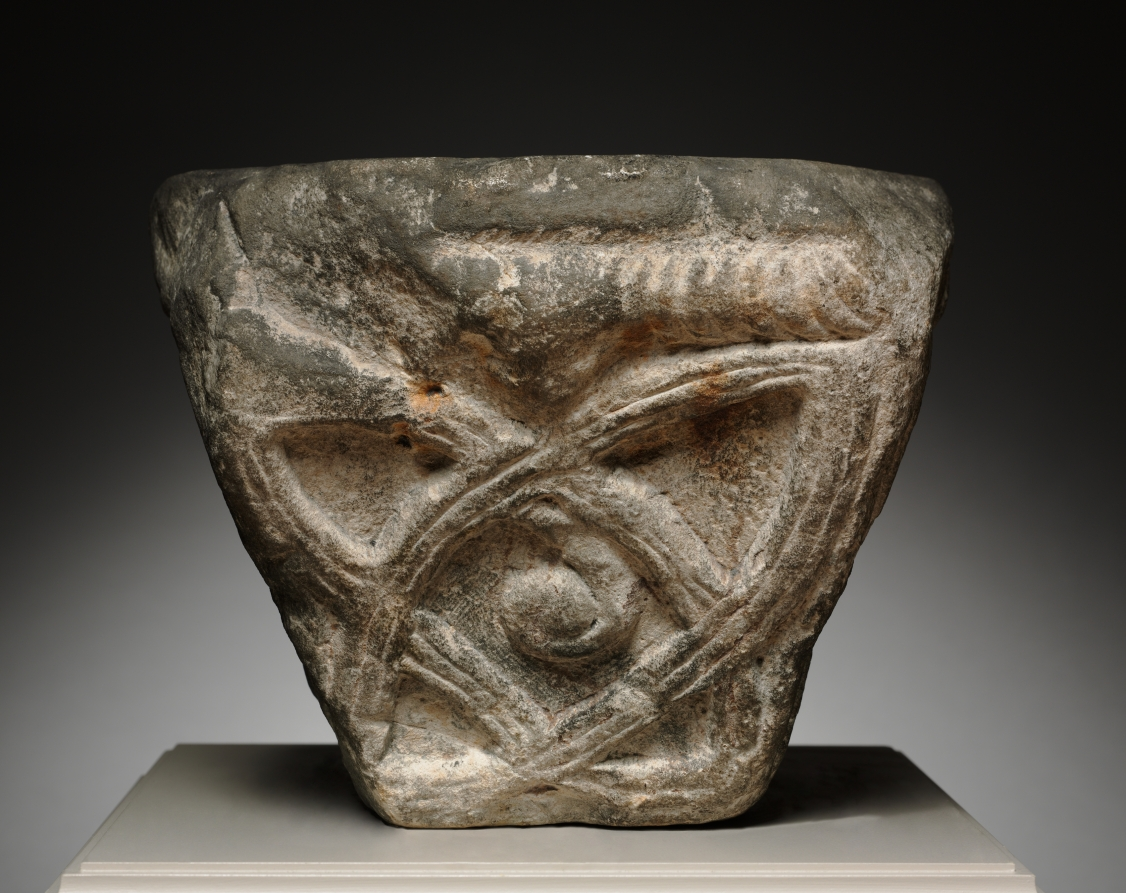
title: Capital with Birds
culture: Italy, Migration period, 8th-9th Century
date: 700s-800s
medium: marble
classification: Sculpture